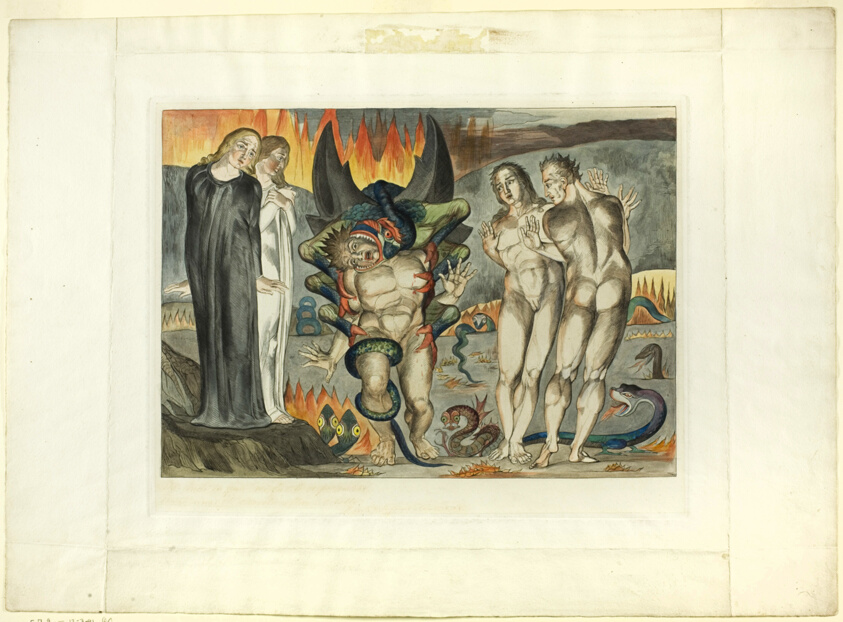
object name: Print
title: The Circle of the Thieves; Agnolo Brunelleschi Attacked by a Six-Footed Serpent. Inferno, canto XXV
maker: William Blake (English, 1757-1827)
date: 1827, printed c. 1892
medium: Hand-colored engraving on India paper, laid down on wove paper (chine collé)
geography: England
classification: engraving; paper; print; prints and drawing